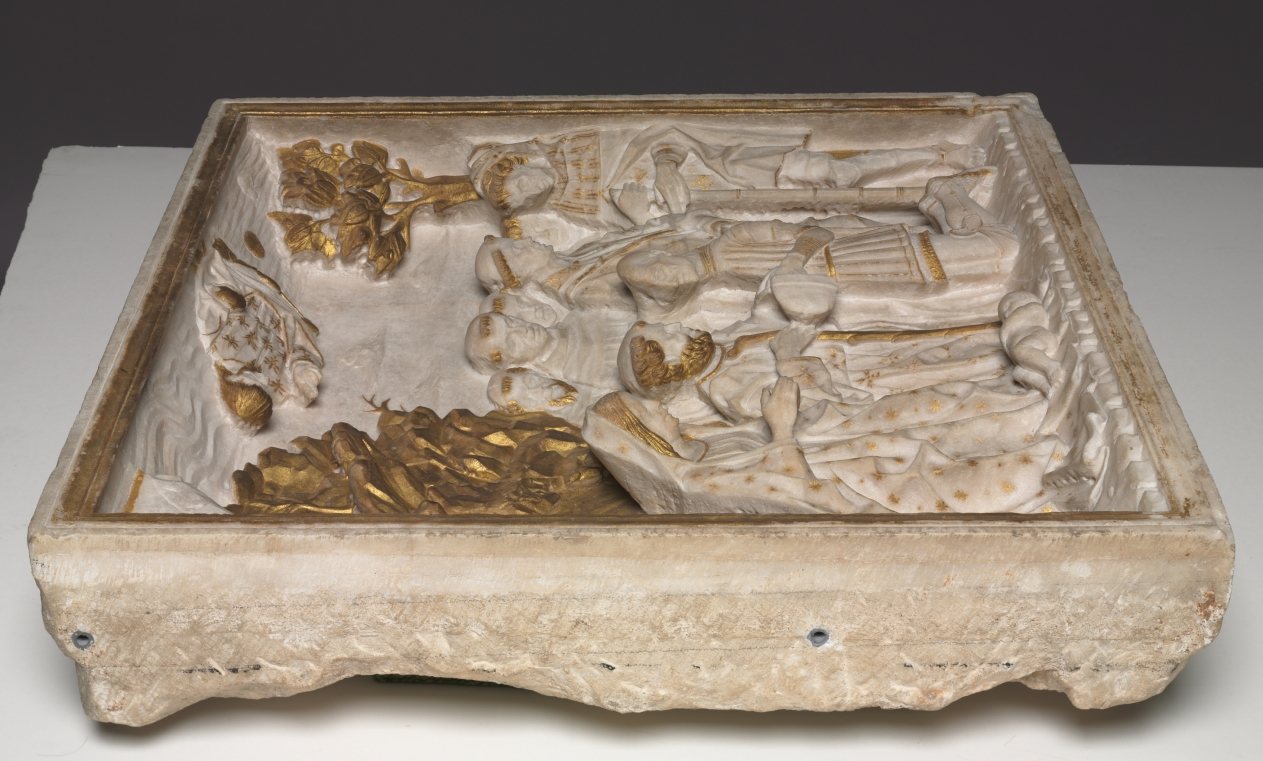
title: Pier Francesco Visconti, Court of Saliceto, Adoring the Christ Child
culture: Italy, Milan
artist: workshop of Benedetto Briosco (Italian, c. 1460–after 1514)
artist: and Tomaso Cazzaniga (Italian)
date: shortly after 1484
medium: marble with gilding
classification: Sculpture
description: This relief formed part of a public funerary monument in the church of Santa Maria del Carmine in Milan. The military leader and diplomat humbly kneels in profile before the infant Christ in a naturalistic setting, drawing attention to the Holy Family’s humanity and the deceased man’s reverence.